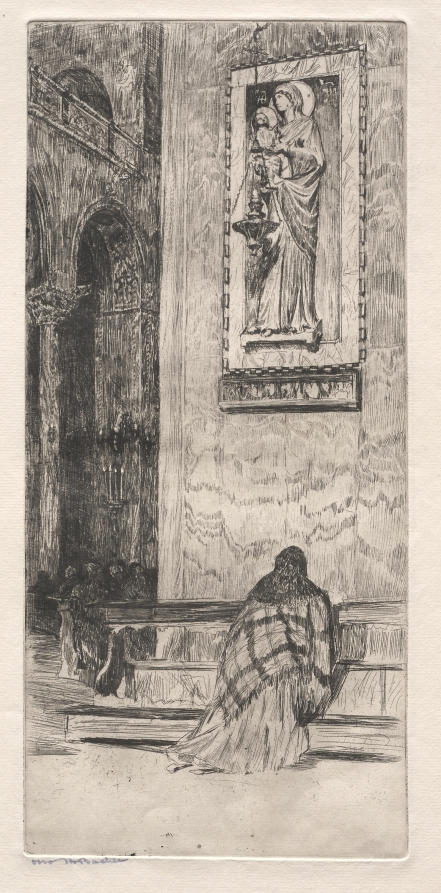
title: Etchings of Venice: St. Marks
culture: America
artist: Otto H. Bacher (American, 1856–1909)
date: 19th century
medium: etching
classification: Print